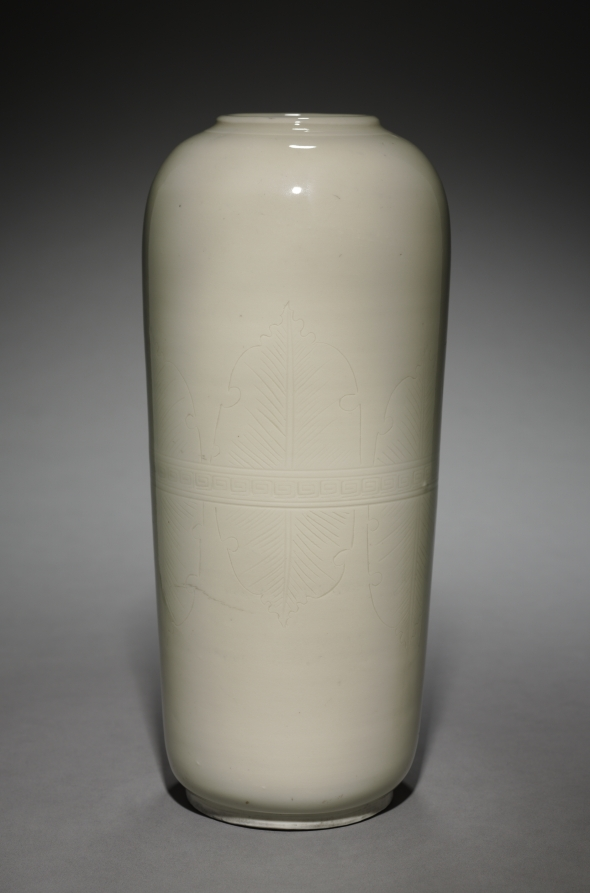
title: Vase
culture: China, Qing dynasty (1644-1911)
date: 1644–1911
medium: porcelain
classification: Ceramic